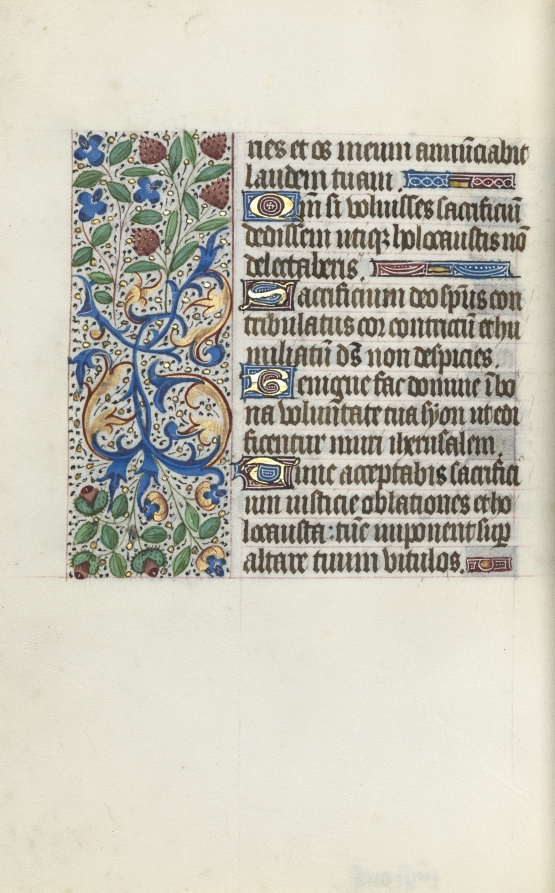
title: Book of Hours (Use of Rouen): fol. 135v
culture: France, Rouen, 15th century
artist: Master of the Geneva Latini (French, active Rouen, 1460–80)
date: c. 1470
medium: ink, tempera, and gold on vellum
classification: Bound Volume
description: In the late 1400s and early 1500s Rouen was an established and important center of book production. The city’s cathedral had a wealthy chapter that spent large sums of money to commission books and to maintain its extensive library. The stationers and booksellers would have likely been concentrated in or near the cathedral precinct. This artist, named after a manuscript now in Geneva, was Rouen’s principal illuminator during the second half of the 1400s.